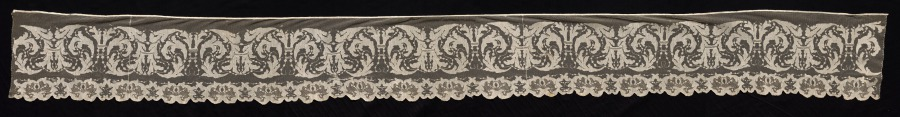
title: Border with Floral Motifs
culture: Italy, Sardinia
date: 1800s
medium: Bleached linen (est.): needle lace, filet/lacis (knotted ground and darned in one direction)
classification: Lace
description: A tendril motif is a recurring pattern in needle lace. The frequent use of the motif, adapted in lace from different centuries and regions, suggests that it was found in a pattern book. Here, the pattern is unusually ornate with additional swirling and flowering motifs.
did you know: This lace was given to the museum by Louise Tifft Brown, a native Clevelander who became an expert in lace while living in Venice for 35 years.